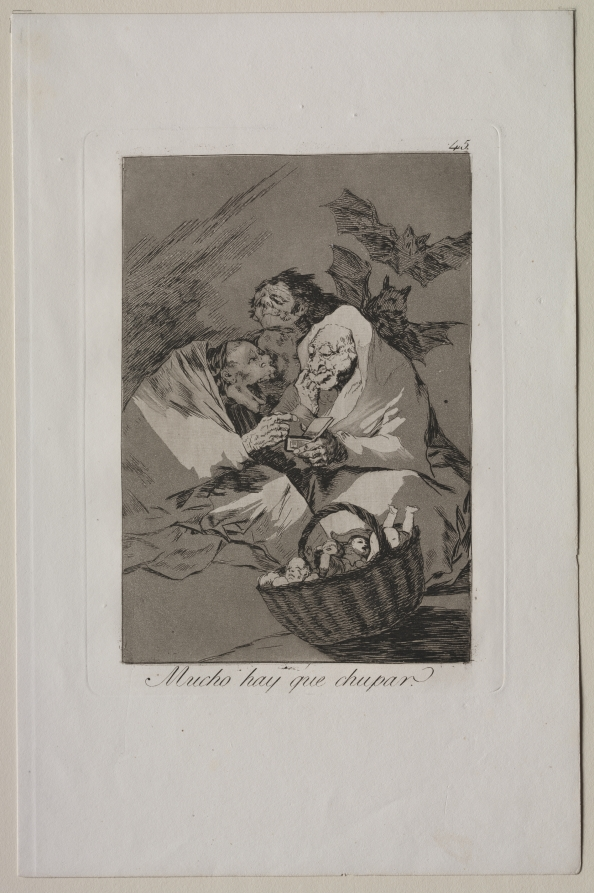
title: There is Plenty to Suck, Plate 45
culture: Spain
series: Los Caprichos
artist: Francisco de Goya (Spanish, 1746–1828)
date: 1799 (printed c.1855)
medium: etching and aquatint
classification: Print